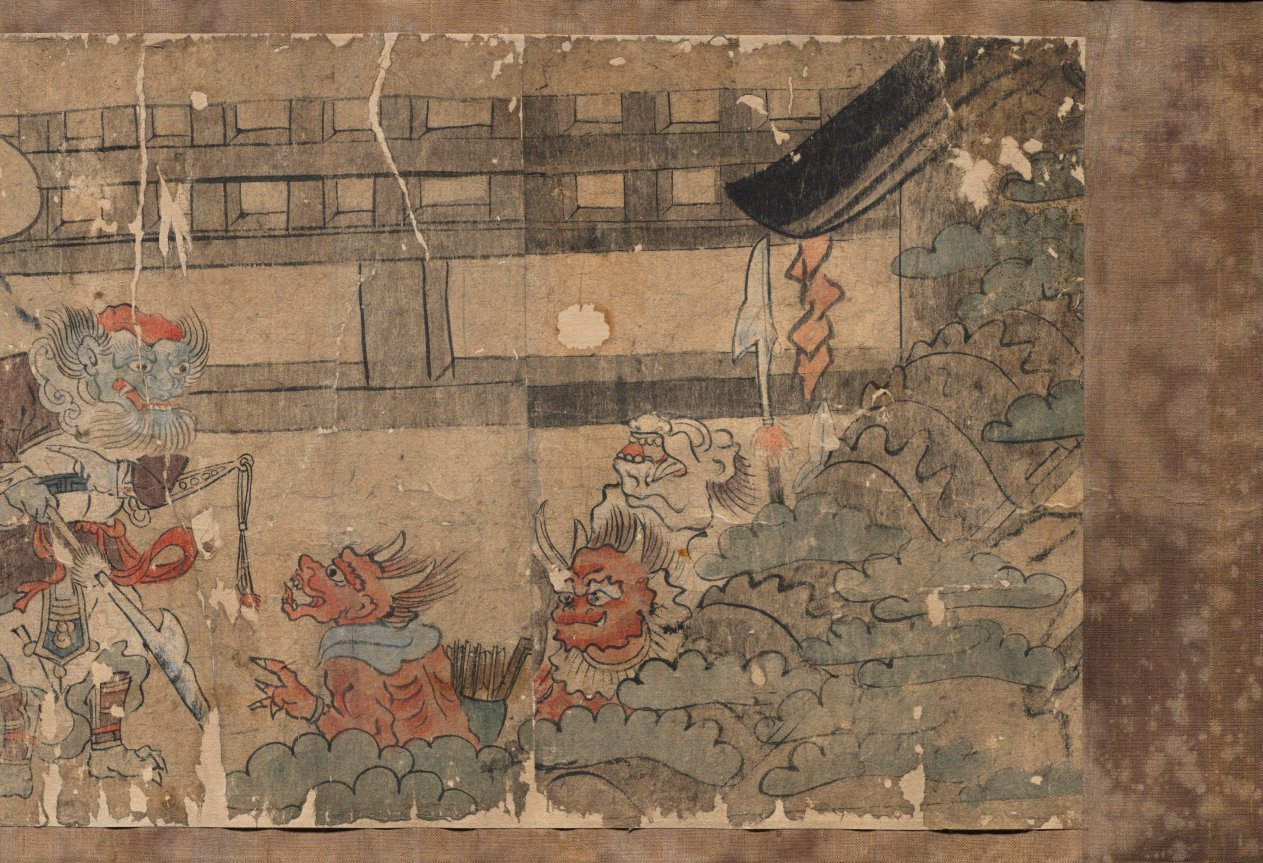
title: Oeyama Engi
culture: Japan, Edo period (1615–1868)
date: 1615–1868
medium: one of a pair of handscrolls; ink and color on paper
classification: Painting